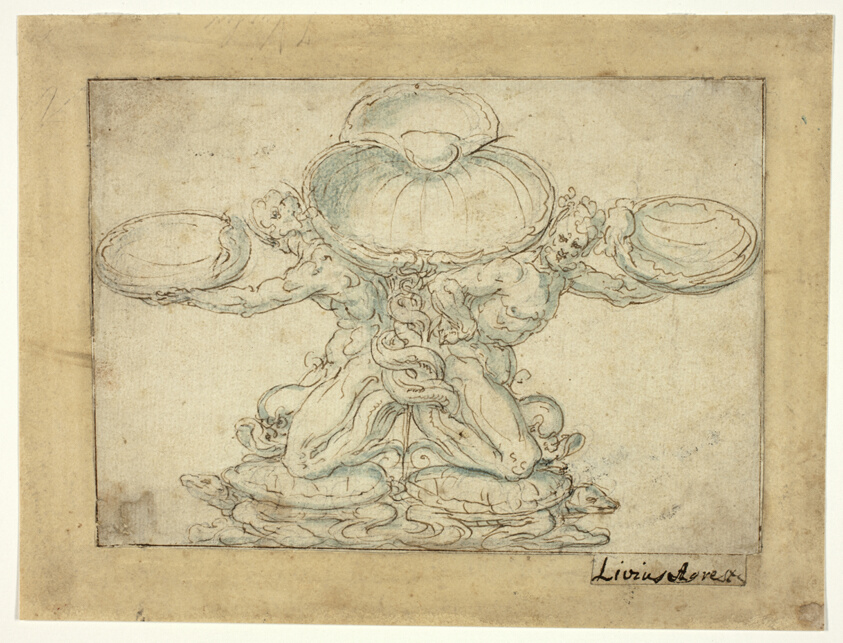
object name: Drawing and Watercolor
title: Design for a Salt Cellar or a Table Fountain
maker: Attributed to Livio Agresti; Italian, 1508–1579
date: 1570-1620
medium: Pen and brown ink, with brush and blue wash, over traces of black chalk, on cream laid paper, perimeter mounted to buff wove paper, prepared with a brown wash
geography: Italy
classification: pen and ink drawings; brush and ink; brush and wash; drawings (visual works); paper; prints and drawing; chalk; chalk with ink